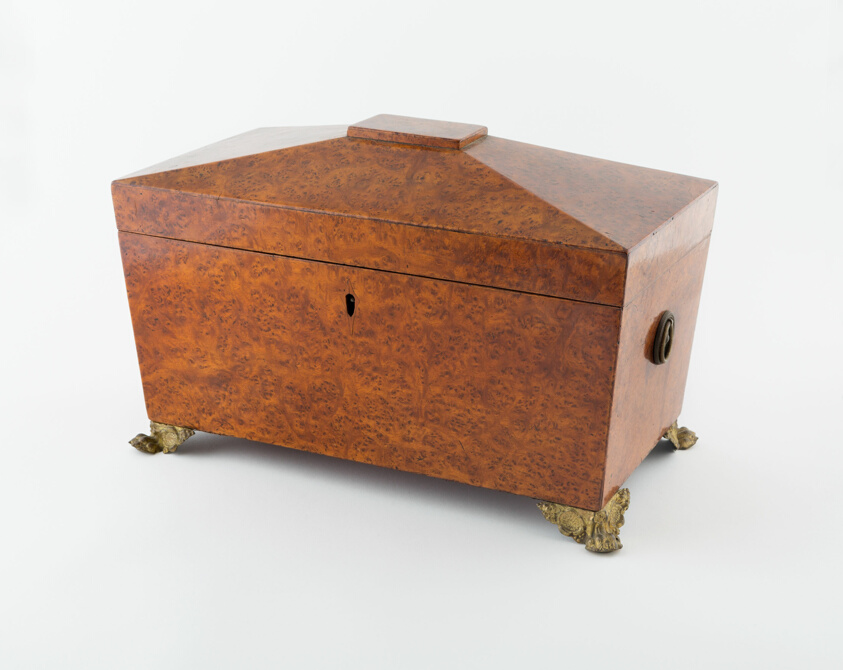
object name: Furniture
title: Tea Chest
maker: England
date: c. 1810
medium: Amboyna or yew burl veneer with gilt metal mounts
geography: England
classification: wood; european decorative arts; furniture